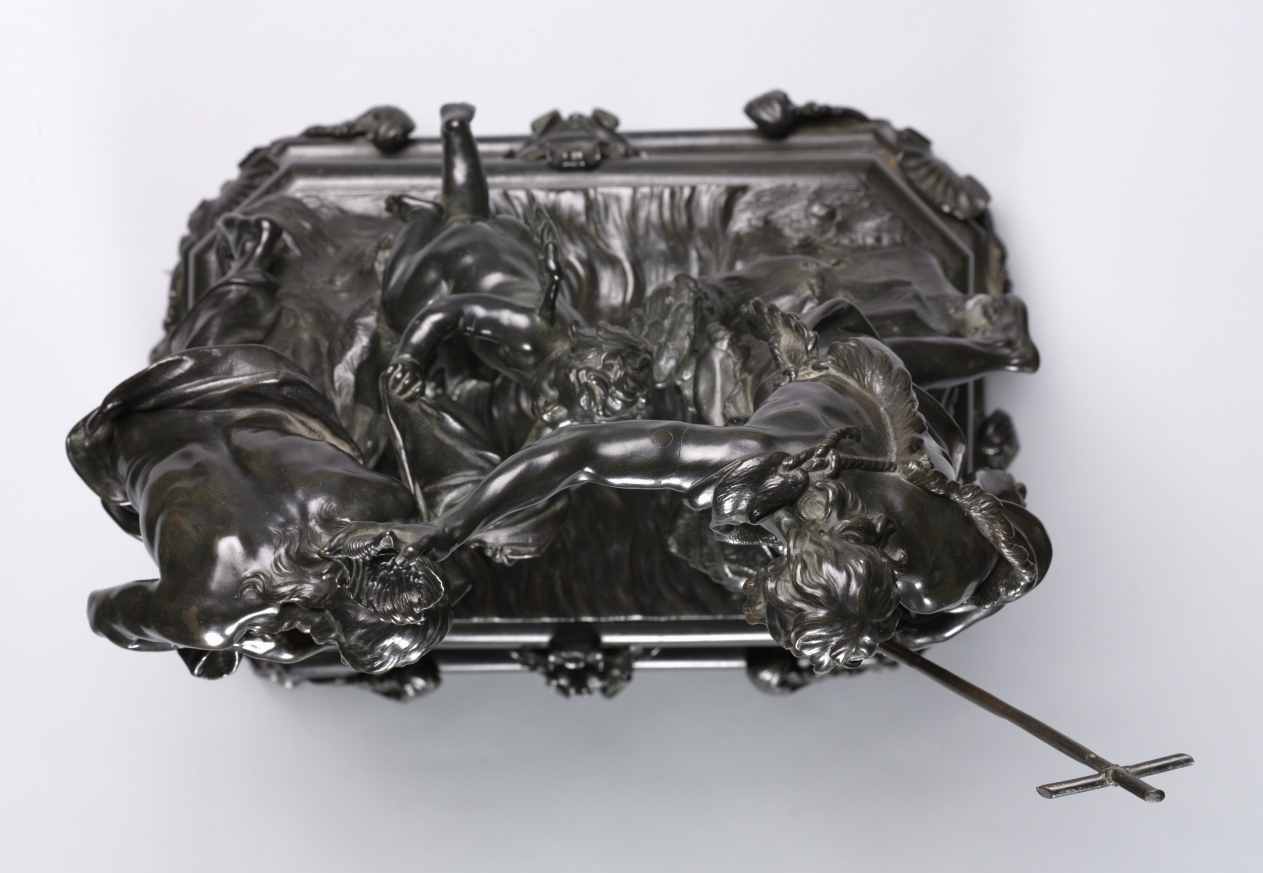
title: Baptism of Christ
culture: Italy, 17th century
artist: Alessandro Algardi (Italian, 1598–1654)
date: designed 1645–46, probably made 1650–55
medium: bronze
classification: Sculpture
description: When Innocent X (Giovanni Battista Pamphili, ruled 1644–55) became pope, Alessandro Algardi endeavored to obtain his patronage. This bronze Baptism of Christ is a casting from the molds used for an original silver sculpture that Algardi presented to the new pope to gain his support in 1646. The composition depicts an important scene in the life of Christ. On the right is John the Baptist, who pours water onto Jesus's head from a shell. As Christ bows his head to be baptized, a little angel holds the edge of his cloak. Algardi worked carefully to make this piece exciting from a number of points of view. Its dramatic emphasis shifts, depending on the viewer's vantage point.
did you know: Algardi's sculpture plays on its intended recipient's given name: Giovanni Battista (John the Baptist).